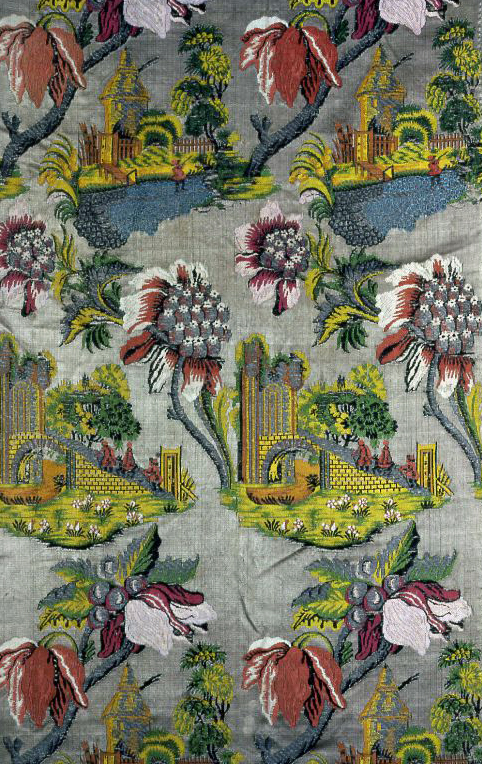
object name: Textile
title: Panel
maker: Possibly France or Netherlands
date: c. 1735/36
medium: Silk and gilt-metal-strip-wrapped silk, warp-float faced 7:1 satin weave with secondary binding warps, supplementary brocading wefts, and self-patterned by areas of twill interlacing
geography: France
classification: textile; weaving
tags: Floating Gardens